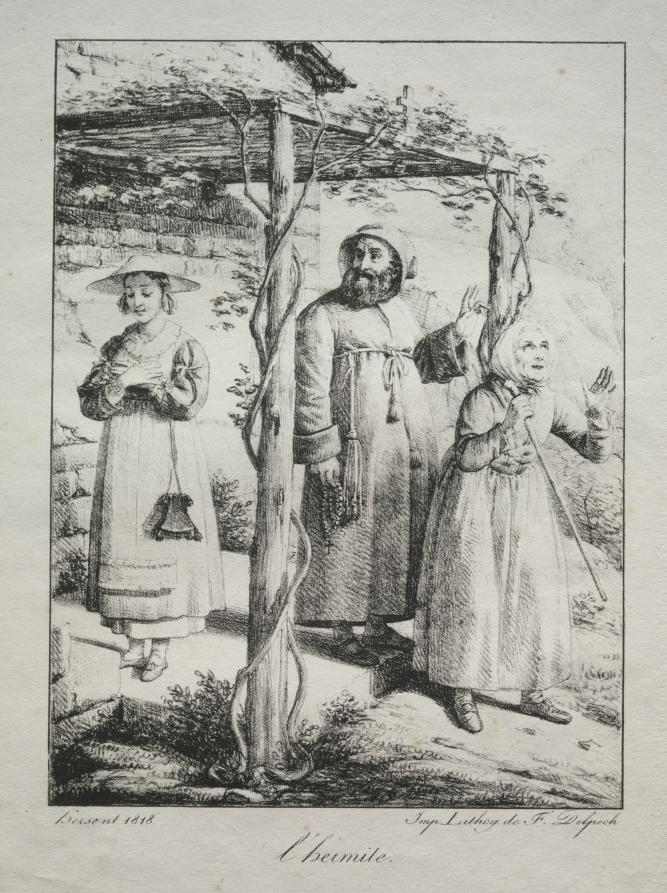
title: The Hermit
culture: France, 19th century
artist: Louis Hersent (French, 1777–1860)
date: 1818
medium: lithograph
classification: Print